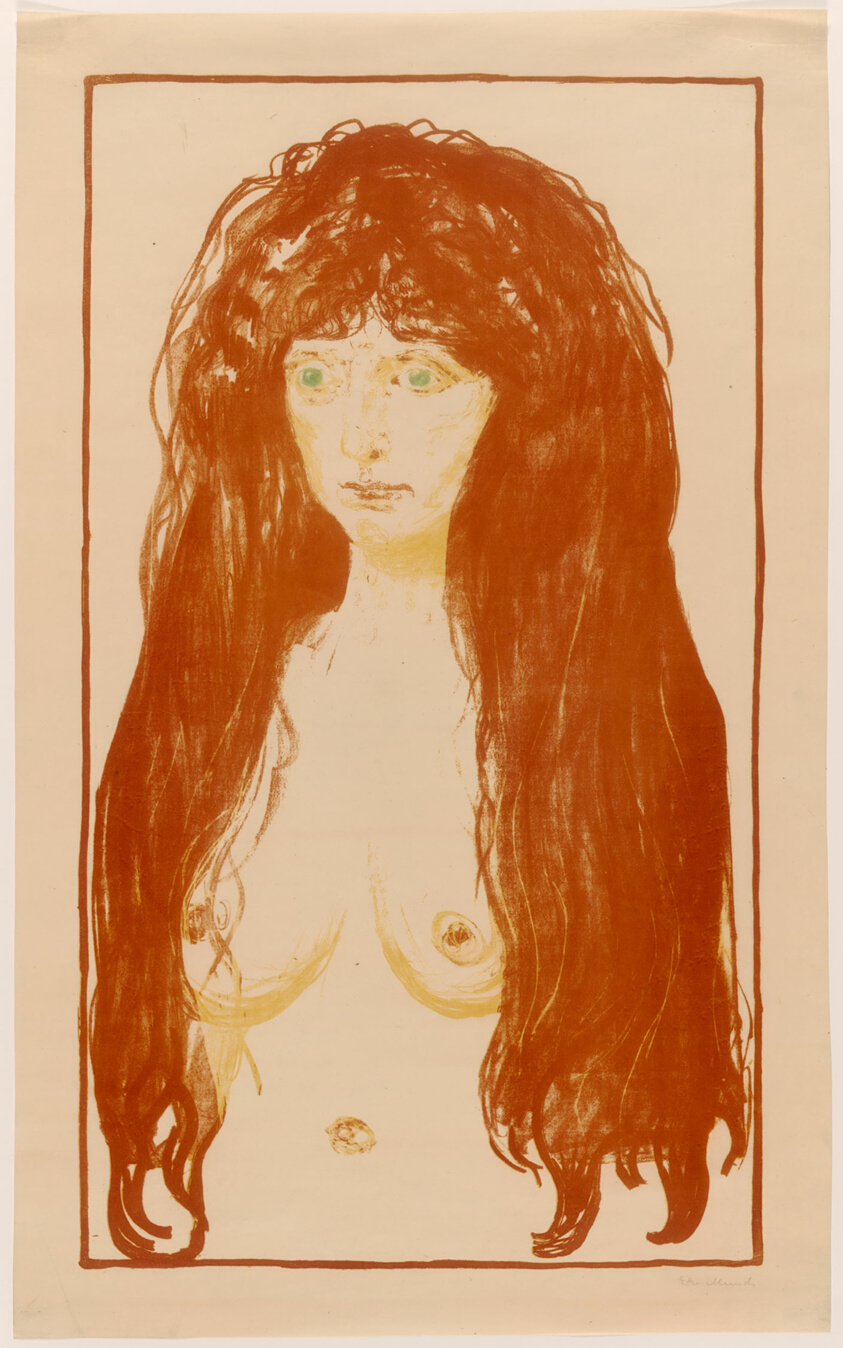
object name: Print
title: Woman with Red Hair and Green Eyes. The Sin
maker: Edvard Munch (Norwegian, 1863-1944)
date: 1902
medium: Transfer lithograph printed from two stones in yellow, reddish-brown and green ink on thin, cream, semi-transparent, wove paper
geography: Norway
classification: lithograph; print; prints and drawing